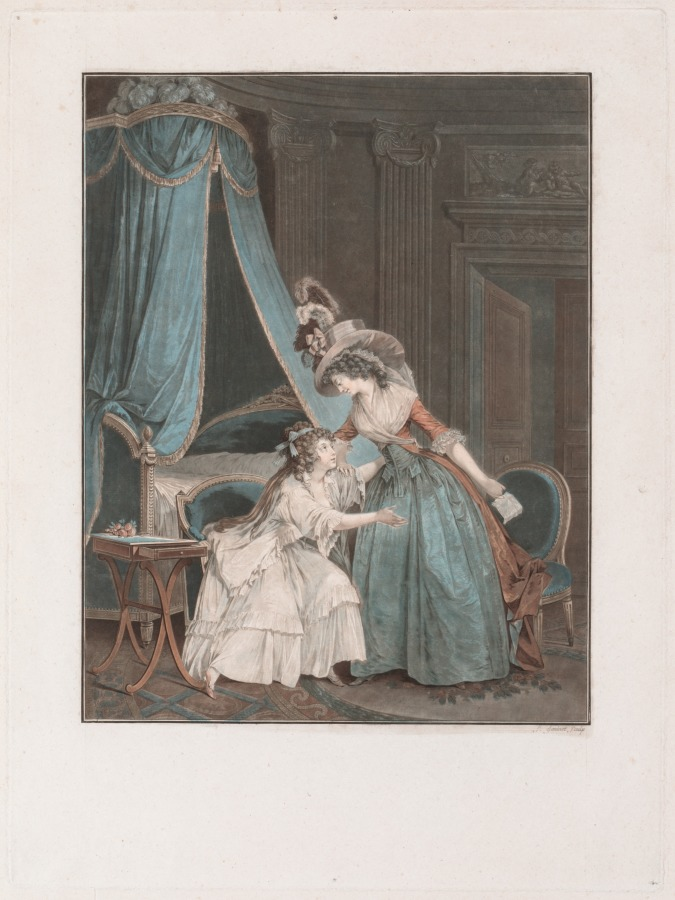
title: The Indiscretion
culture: France, 18th century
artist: Jean François Janinet (French, 1752–1814)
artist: after Nicolas Lavreince (Swedish)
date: 1788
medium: Color wash-manner engraving and etching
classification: Print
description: The Indiscretion is from a suite of three scenes of women sharing secrets in the privacy of their boudoirs. The woman wearing a decadent hat has taken a love letter from the girl in white, who pleads with her older companion to give it back. Janinet refined the tools used in chalk-manner printmaking to create wash-manner etchings and engravings that imitate opaque watercolors, such as The Lover’s Visit and The Surprised Lovers on view nearby.